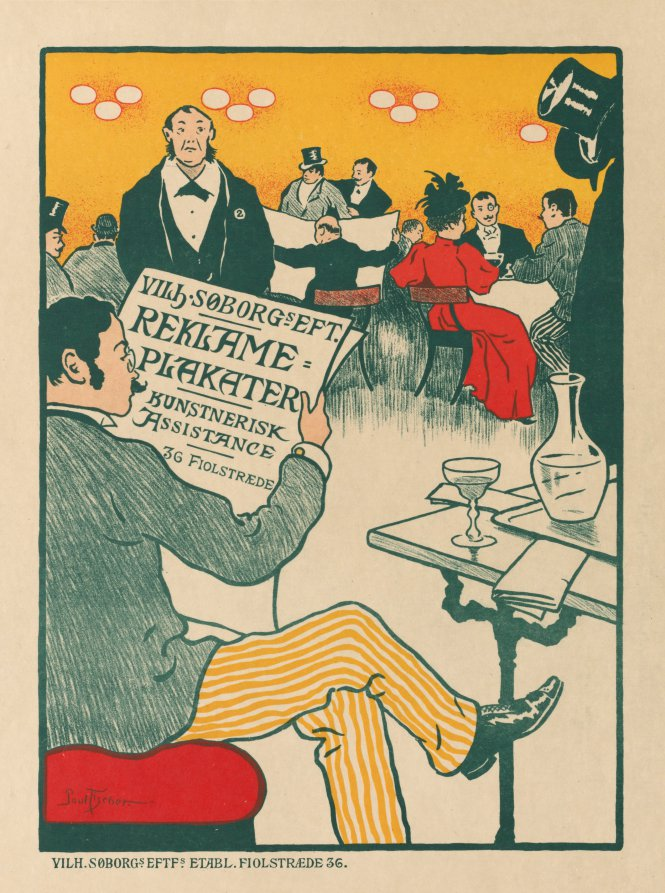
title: Masters of the Poster: Poster for Exhibition of Artistic Posters of Wilhelm Söborg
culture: France, 19th century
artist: Paul Gustav Fischer (Danish, 1860–1934)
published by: Soborg, Copenhagen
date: c. 1895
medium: color lithograph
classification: Print